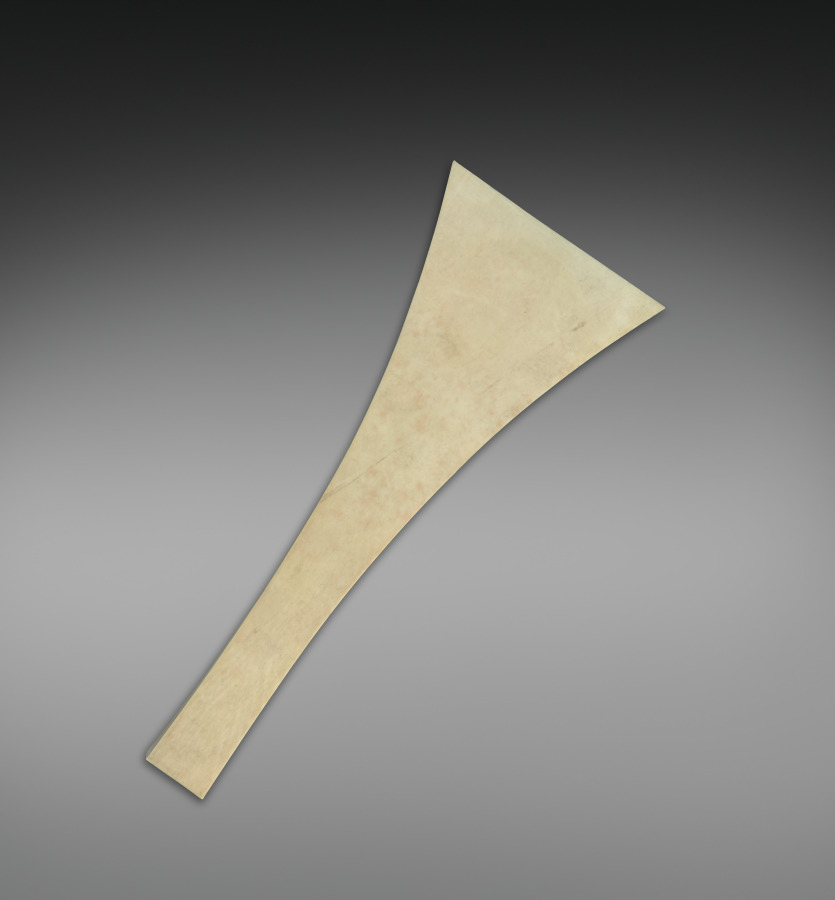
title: Guitar (plectrum)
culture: Japan, Edo period (1615–1868)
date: early to mid-1800s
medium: mixed media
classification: Musical Instrument